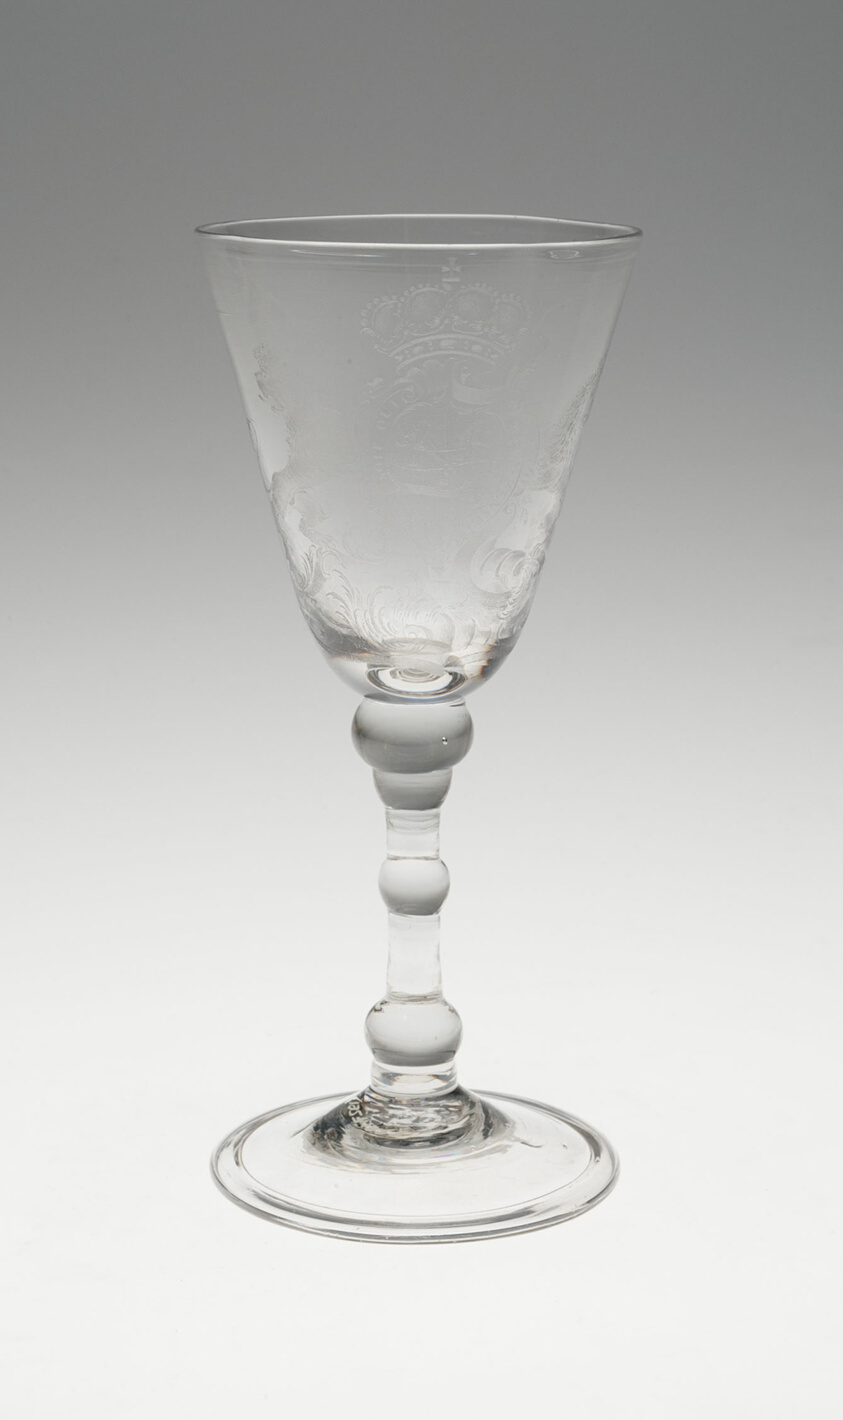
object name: Glass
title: Wine Glass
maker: England or Netherlands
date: c. 1760/80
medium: Glass, blown and stipple engraved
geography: England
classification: drinking vessel; glass; european decorative arts